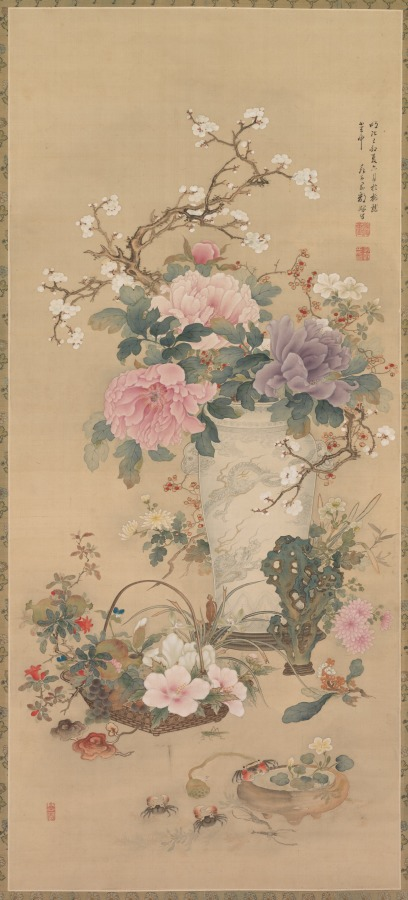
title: Vase of Flowers with Grasshopper, Marine Life, and Garden Rock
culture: Japan, Meiji period (1868–1912)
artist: Okabe Ko (Japanese)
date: late 1800s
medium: hanging scroll; ink and color on silk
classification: Painting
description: A great interest in Western scientific studies developed in Japan during the late Edo period (1615-1868) and into the Meiji era (1868-1912). One outcome of this phenomenon in the visual arts was the detailed portrayal of plant, animal, and marine life. This painting is an assemblage of objects carefully observed from nature, but not usually seen together.